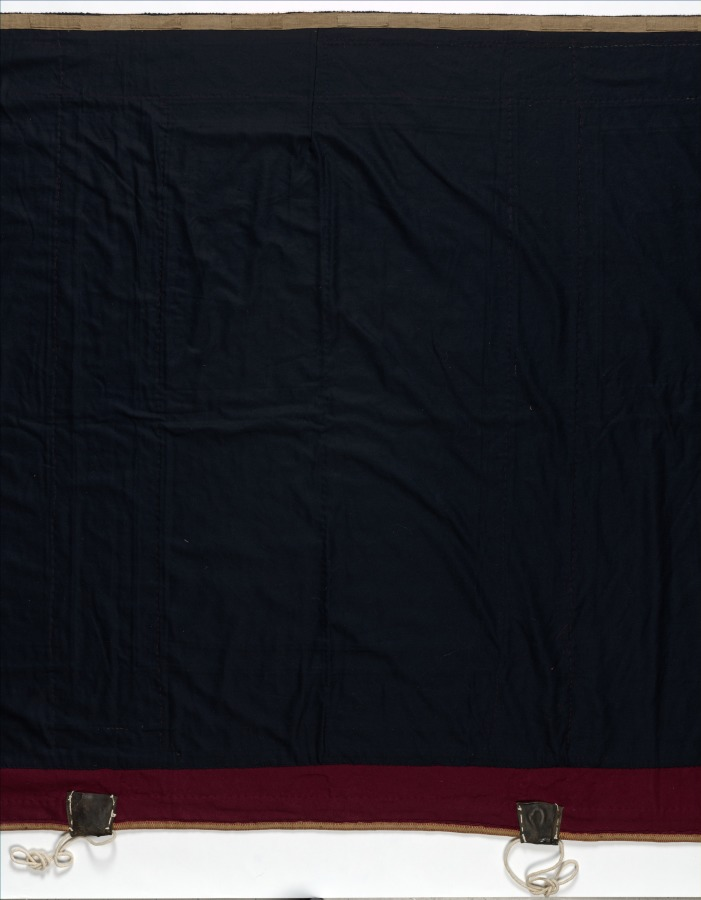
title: Royal Round Tent made for Muhammad Shah (wall panel with three design units)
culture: Iran, Rasht, Qajar period (1779-1925)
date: 1834–48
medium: Wool with silk embroidery (chain stitch), rope, cotton, leather, tape; Rasht work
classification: Textile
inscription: Inscriptions: The central design unit of this wall panel has two embroidered inscriptions. 1. Upper inscription (center of the top blossom): "Muhammad shah sultan-e ghazi."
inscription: 2. Lower inscription (on the base of the vase): "Kamtarin bandeh-ye dargah fath'ali."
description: Royal tents were potent symbols of authority, wealth, and power throughout the greater Middle East. Rulers owned thousands of tents. They were used for shelter, shade, and innumerable functions in tent compounds that were essential for imperial ceremonies, travel, and military campaigns. Distinguished by size with elaborately decorated interior walls and ceilings, tents could be as large as castles. Opulent tents were also presented as imperial gifts. Tents are only known through documents before 1600. For example, in Baghdad in 809, Caliph Harun al-Rashid owned 4,000 ceremonial tents and 150,000 camping tents that were stored in the imperial Abbasid treasury. An astonishing variety and quantity of tents were housed in the royal Fatimid tent storeroom in Cairo in 1068-69, including "military tents, fortress tents, and castle tents, manufactured of . . . gold-brocaded stuff embroidered with designs of elephants, wild beasts, horses, peacocks, birds." Since 1600, Ottoman Turkish tents with elaborate floral decoration have been preserved in Istanbul in the Topkapi Palace Museum and Military Museum, and in European collections as war booty, primarily from the Ottoman Turks' attempt to conquer Vienna in 1683. These tents are not done in the Rasht technique, but rather are applique. In contrast, royal tents from Iran are extremely rare. This spectacular ceremonial tent is embroidered with the name of its owner, Muhammad Shah, who ruled Iran from 1834 to 1848 during the Qajar dynasty. The radiant jewellike interior features exuberant flora, blossoming vines, and robust birds made with colored wool embellished with silk-thread embroidery.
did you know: Rasht work is named after the city on the Caspian Sea in present-day Iran, which was a major silk trade center with numerous textile workshops.